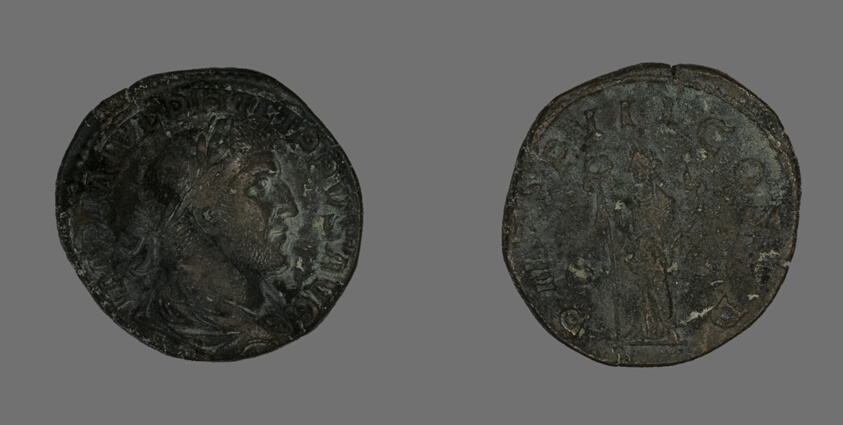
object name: Coin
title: Sestertius (Coin) Portraying Philip the Arab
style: roman (ancient, style or period), ancient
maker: Roman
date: 246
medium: Bronze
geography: Roman Empire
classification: coin; ancient art